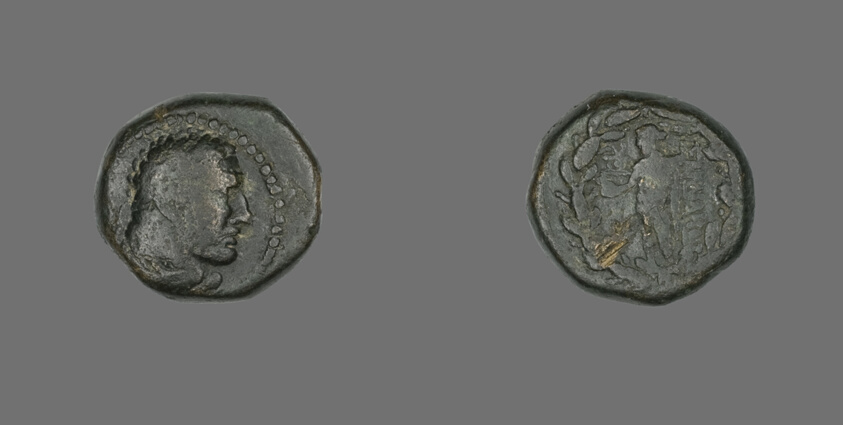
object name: Coin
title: Coin Depicting the Hero Herakles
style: greek, ancient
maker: Greek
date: about 133 BCE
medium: Bronze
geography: Ancient Greece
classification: coin; ancient art